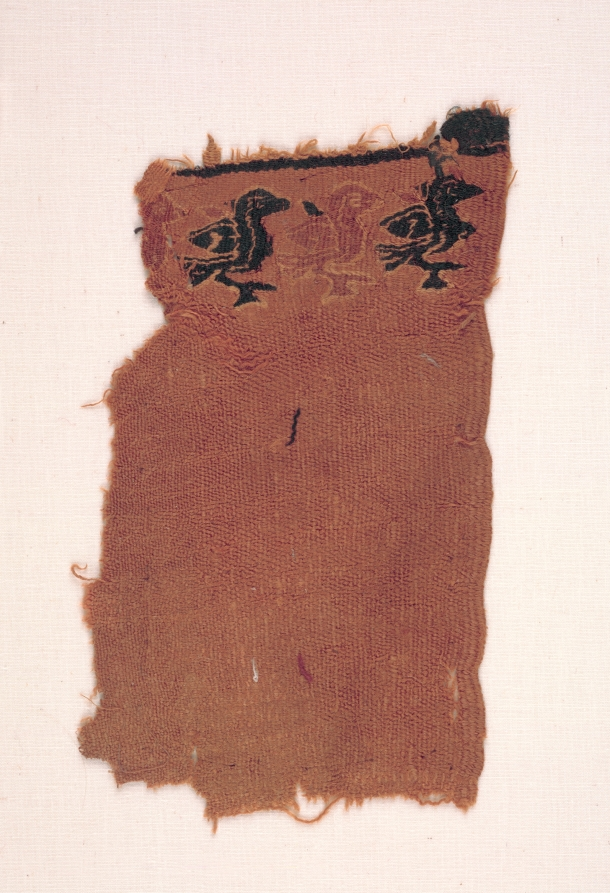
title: Fragment with Frieze of Birds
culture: Egypt, Byzantine period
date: 400s - 500s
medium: tabby ground, inwoven tapestry ornament; wool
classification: Textile